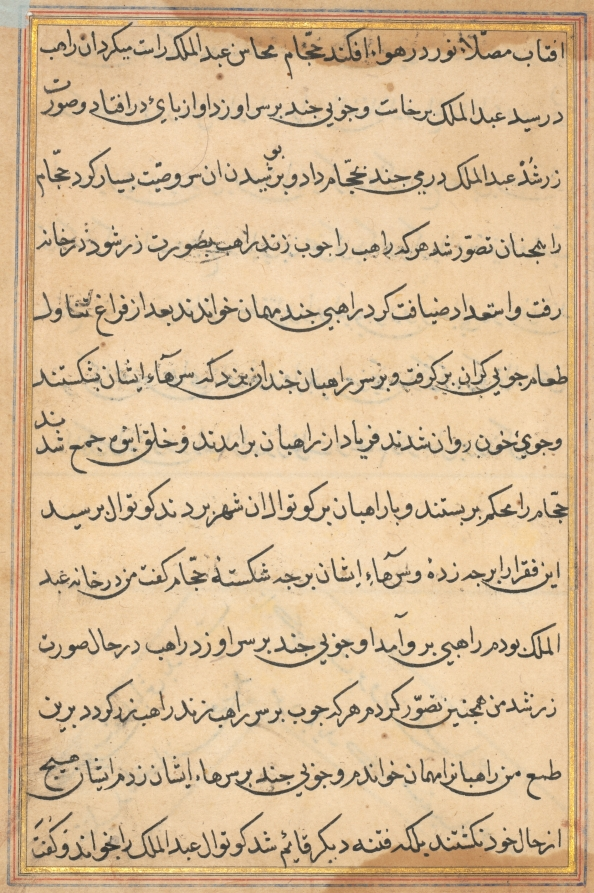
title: Page from Tales of a Parrot (Tuti-nama): text page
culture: Mughal India, court of Akbar (reigned 1556–1605)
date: c. 1560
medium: gum tempera, ink, and gold on paper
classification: Painting